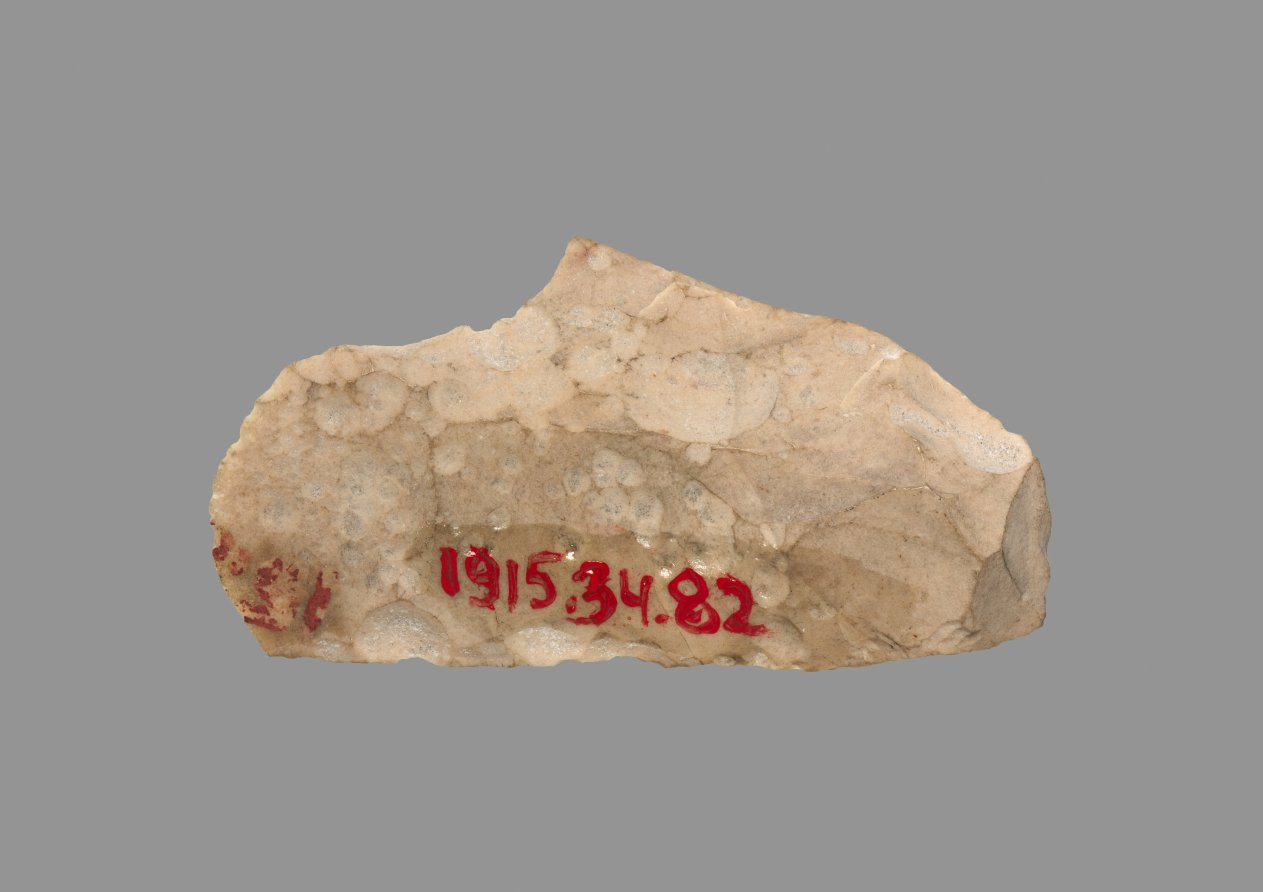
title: Sickle Blade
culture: Egypt, Middle Kingdom (2040–1648 BCE), Dynasty 12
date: 1980–1801 BCE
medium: flint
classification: Implements